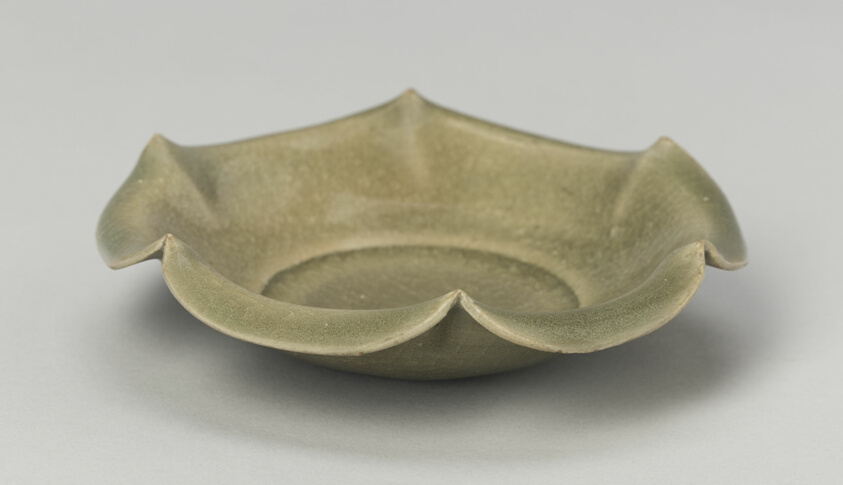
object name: Vessel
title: Dish with Inverted Petal-Lobed Rim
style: Chinese (culture or style)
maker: China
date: Northern Song dynasty (960–1127)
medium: Yaozhou ware; glazed stoneware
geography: China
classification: dish (vessel); ceramics; vessel